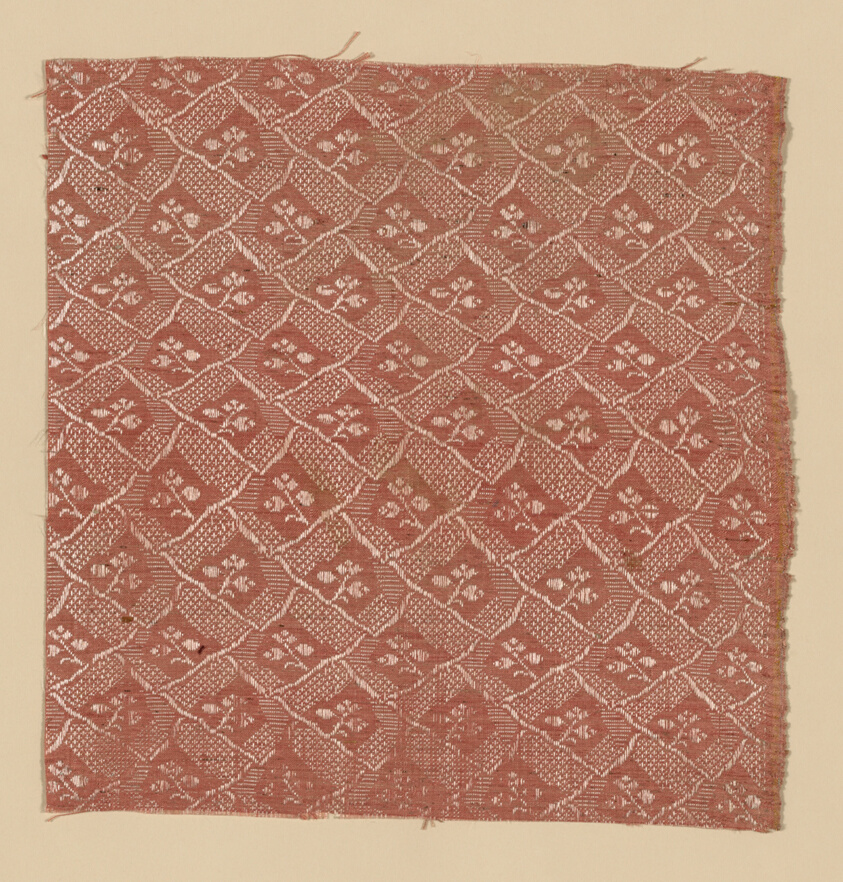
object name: Textile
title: Fragment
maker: Europe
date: 19th century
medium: Silk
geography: Europe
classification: textile; weaving